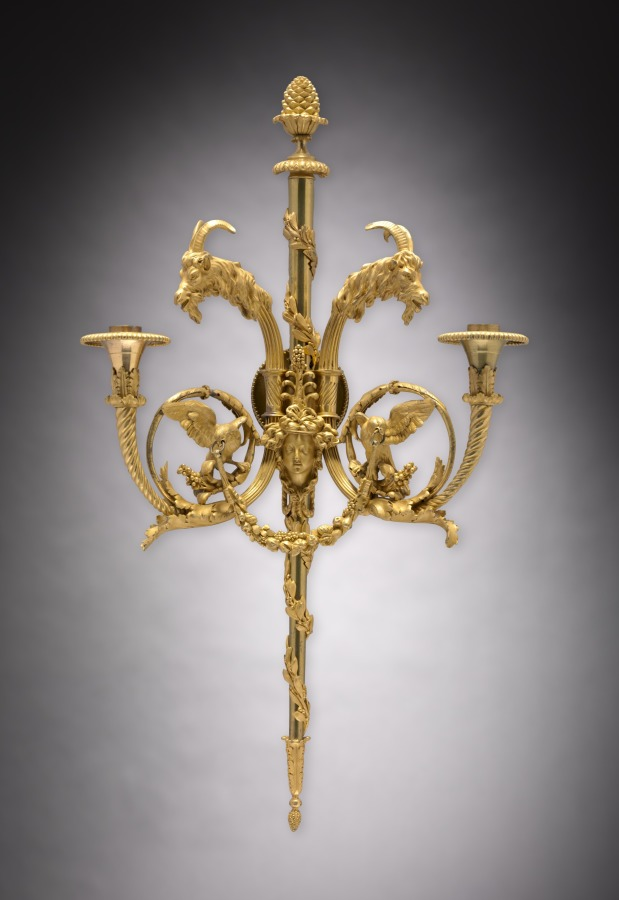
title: Candle Bracket Pair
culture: France, style of Louis XVI, 18th Century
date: c. 1780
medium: gilt bronze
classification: Furniture and woodwork